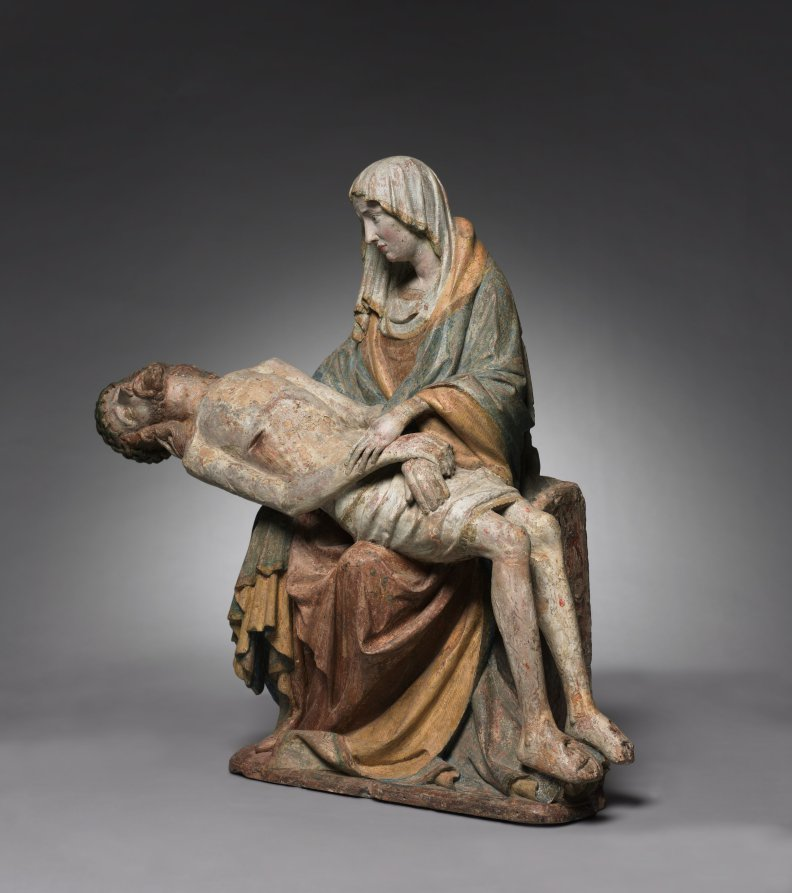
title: Vesperbild (Pietà)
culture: Austria, Steiermark, 15th century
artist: Master of Grosslobming (Austrian)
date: c. 1420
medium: painted cast stone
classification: Sculpture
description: The word vesperbild is the German word for pietà, the image of the Virgin Mary cradling her dead son on her lap. The theme has no literary source; it originated in Germany during the early 1300s and was more widespread in central Europe than in Italy. These devotional sculptures were used within the interior of a church, in small side chapels dedicated to the Virgin. As in this example, they often convey her grief in a sensitive way. For those who prayed before them, vesperbilds were poignant reminders of the Passion of Christ and the suffering of the Virgin.